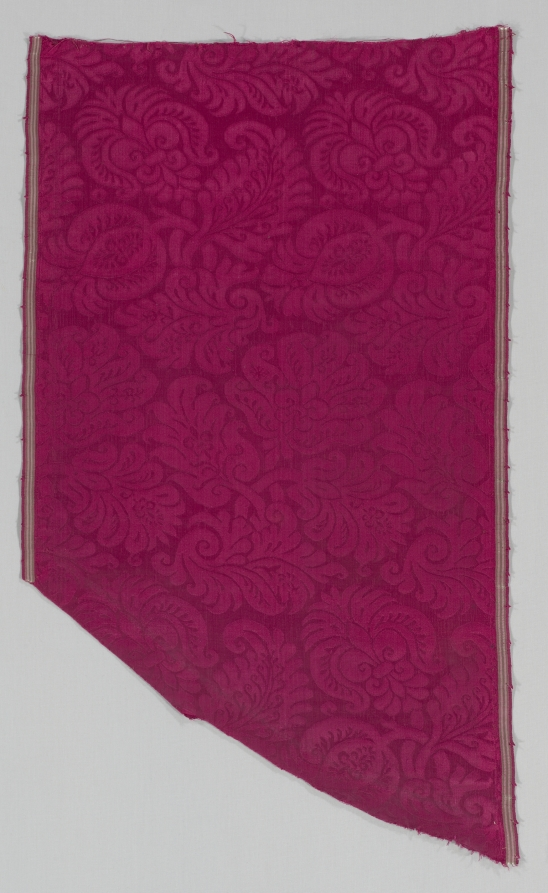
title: Length of Silk Damask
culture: Italy, late 17th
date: late 1600s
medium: damask, silk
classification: Textile